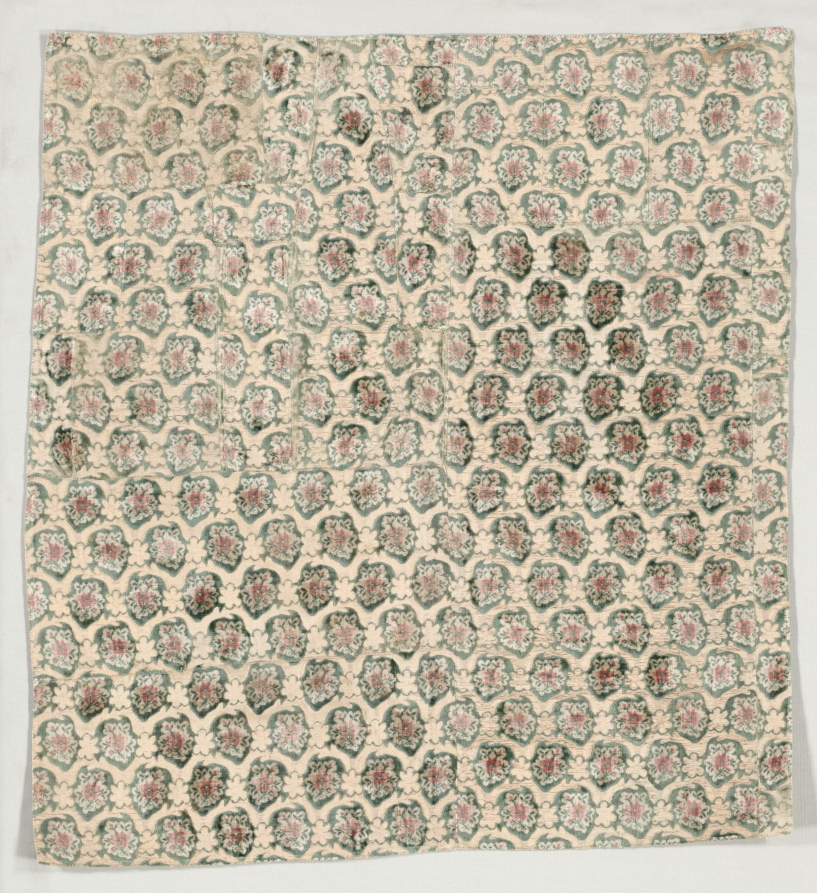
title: Velvet Segment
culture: Italy, early 19th century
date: c. 1800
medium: velvet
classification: Velvet